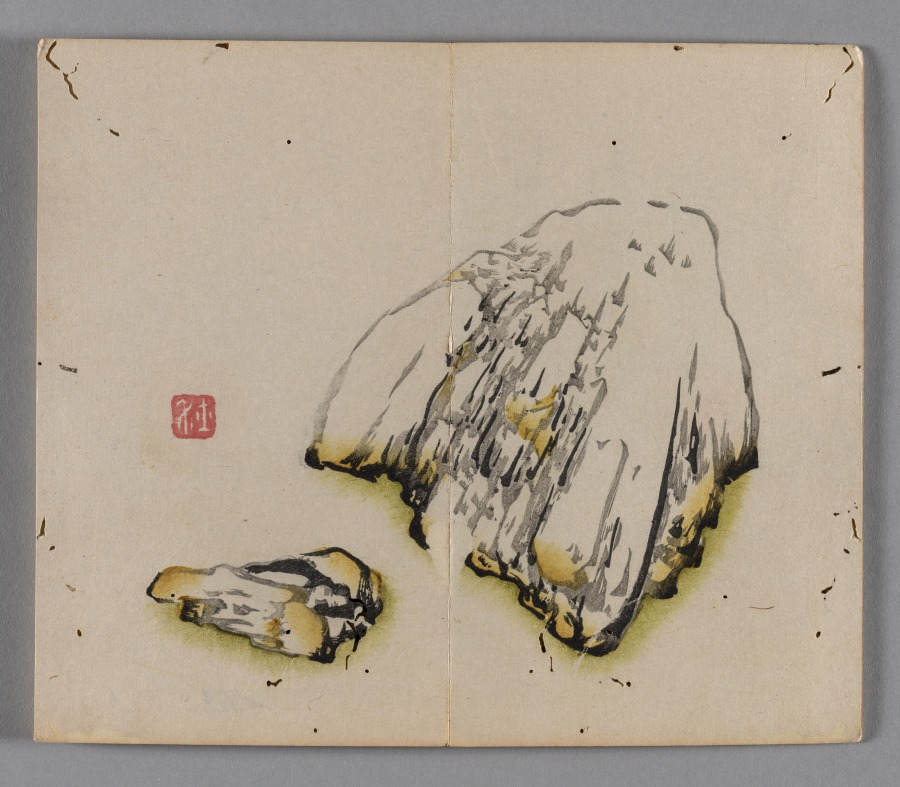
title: Ten Bamboo Studio Collection of Calligraphy and Painting: Miscellaneous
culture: China, Qing dynasty (1644-1911)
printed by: Hu Zhengyan (Chinese, c. 1584–1674)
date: 1633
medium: Woodblock-printed book; ink and colors on paper; first edition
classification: Print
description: Color printing reached a level of perfection in the early 1600s, as seen in this Ten Bamboo Studio Collection of Calligraphy and Painting and the Mustard Seed Garden Manual of Painting (printed 1679 and 1701). The painterly quality, precision in registering (aligning) the woodblocks, and harmonious colors made them the most successful color print editions in Chinese history. Both editions were printed and compiled in Nanjing, spread nationwide, and had a great impact on the arts in Japan and Korea.